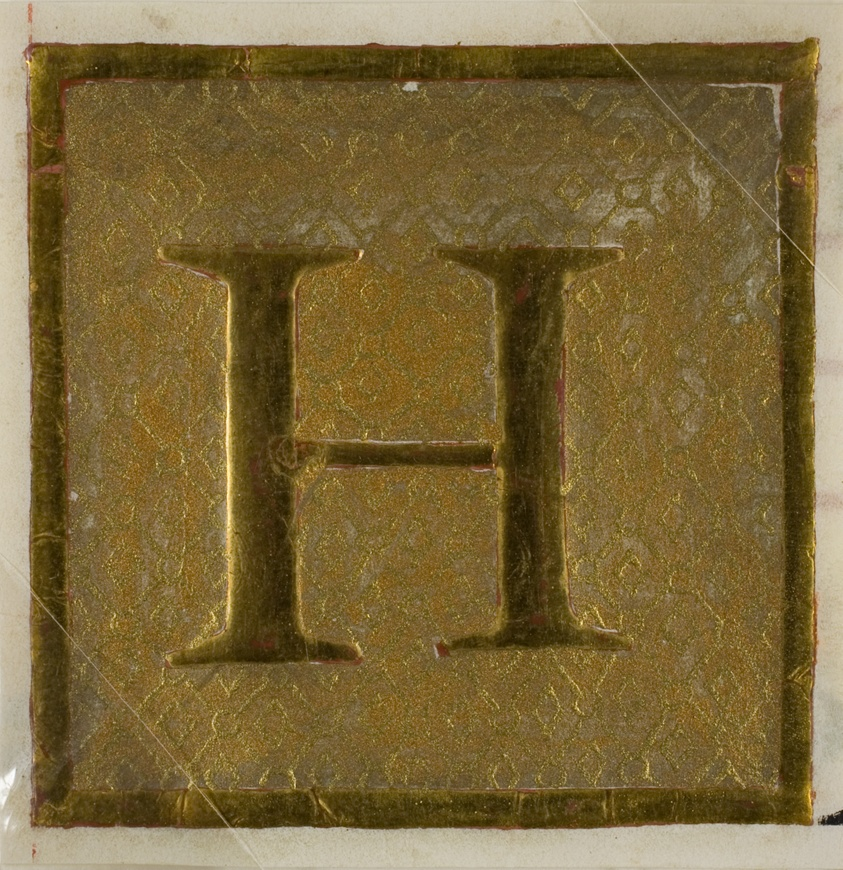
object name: Drawing and Watercolor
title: Illuminated Initial "H" in Diaper Pattern from a Choirbook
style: medieval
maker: European (possibly France)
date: 18th or 19th century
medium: Manuscript cutting in tempera, gold leaf and gold paint on vellum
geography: Europe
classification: painting; manuscript; prints and drawing